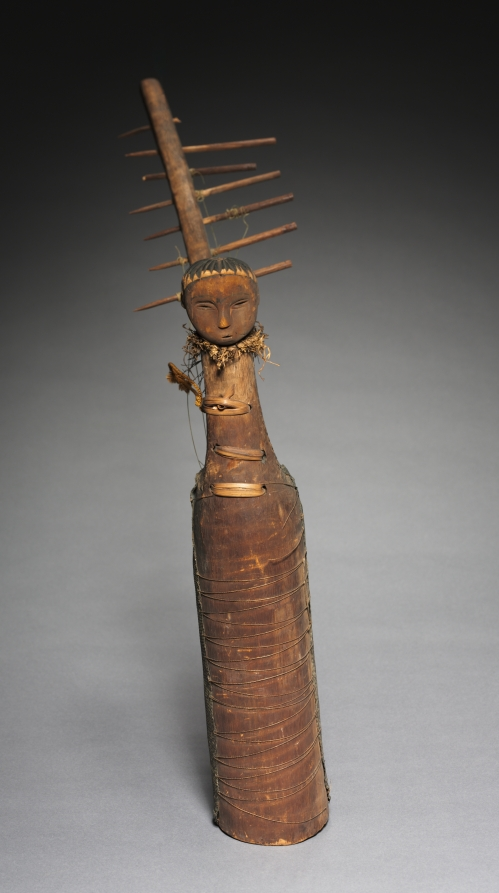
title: Harp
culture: Africa, Central Africa, Democratic Republic of Congo, unknown maker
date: 1900s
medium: Wood, snakeskin, plant fiber, cane, string, and colorant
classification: Musical Instrument